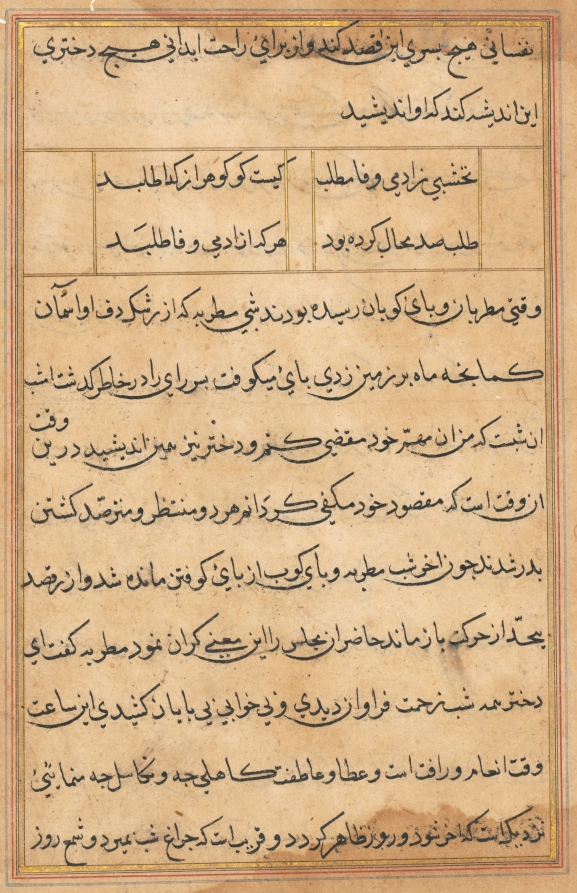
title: Page from Tales of a Parrot (Tuti-nama): text page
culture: Mughal India, court of Akbar (reigned 1556–1605)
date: c. 1560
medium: gum tempera, ink, and gold on paper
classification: Painting